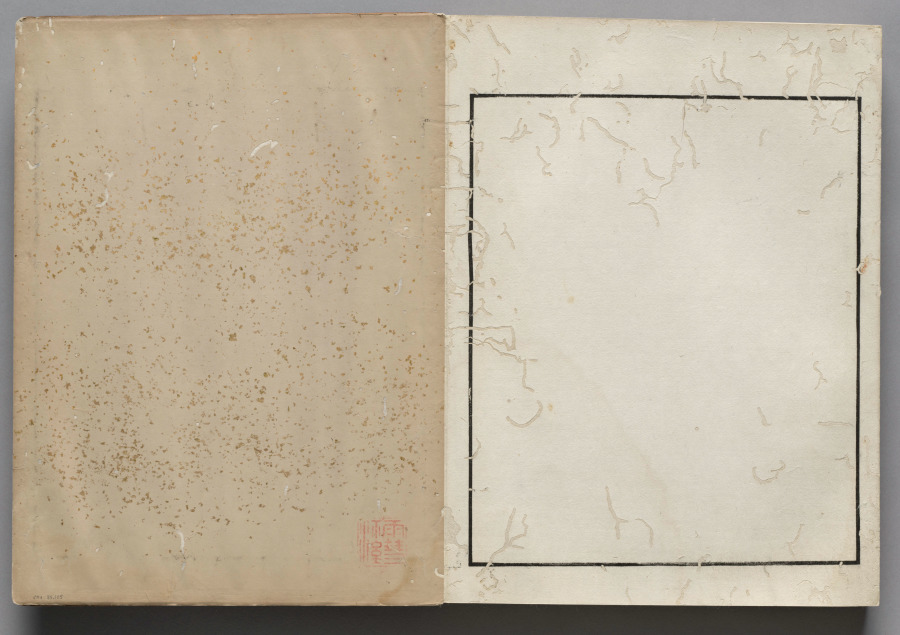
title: Album of Actor Portraits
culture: Japan, Edo period (1615–1868)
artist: Shōrakusai (Japanese)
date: c. 1790–1810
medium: accordion-style album; ink and color on silk mounted on paper and ink on paper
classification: Bound Volume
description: The paintings in this album show Kabuki actors costumed for their roles in a variety of plays. The characters are identified in the paper cartouches affixed to the paintings. While each painting is on silk that has been pasted into the album, the poems on some of the facing pages have been written in ink directly onto the page.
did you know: This album contains paintings of Kabuki actors who performed in the city of Osaka.